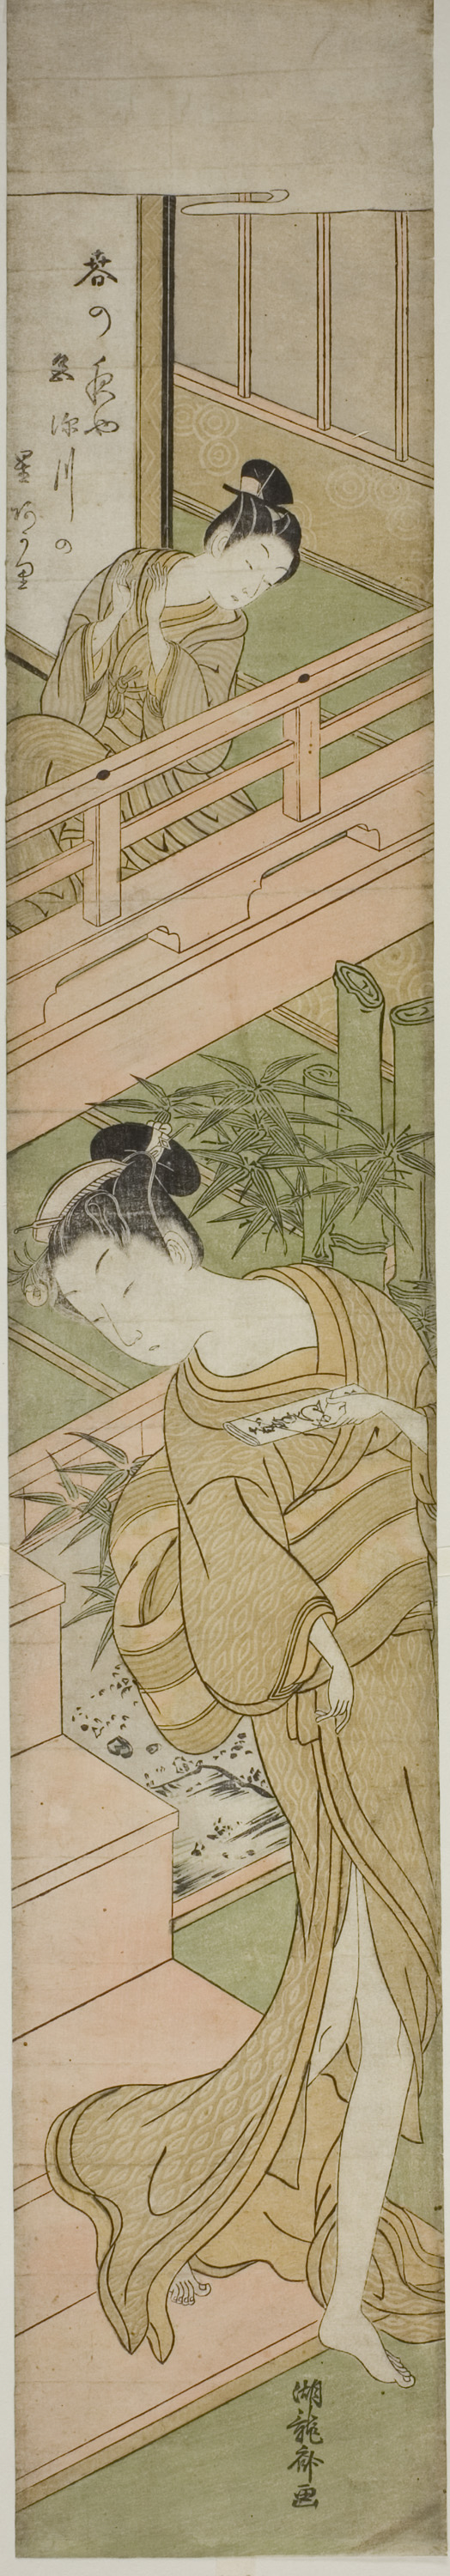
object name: Print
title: Attracting her attention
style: Japanese (culture or style)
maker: Isoda Koryusai (Japanese, 1735-1790)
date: c. 1771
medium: Color woodblock print; hashira-e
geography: Japan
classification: woodblock print; print; asian art